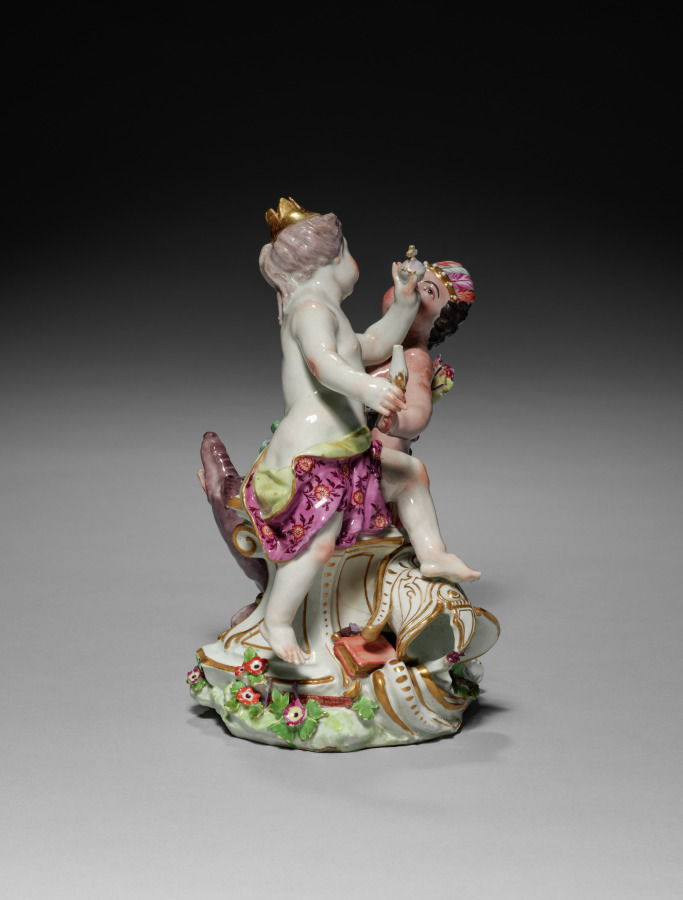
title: Figure of Europe and America from the Four Continents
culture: England, Chelsea, mid-18th century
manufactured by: Chelsea Porcelain Factory (Britain, London, 1745–84)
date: c. 1760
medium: soft-paste porcelain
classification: Ceramic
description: Often collected by wealthy British merchants who were beneficiaries of colonial expansion, figural groups were frequently part of elaborate table decorations meant to signify wealth and global dominance. Here, Europe is seen holding an orb and wearing a crown as queen of the world, suggesting Europe’s supremacy over the other continents. She is entangled with America, who is wearing feathers with a bow and arrow at her feet. This depiction of America reveals a purely imagined understanding of faraway places.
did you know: Figural representations of the four continents date back to the 1500s, but such imagery became even more popular in the 1700s as European empires expanded.